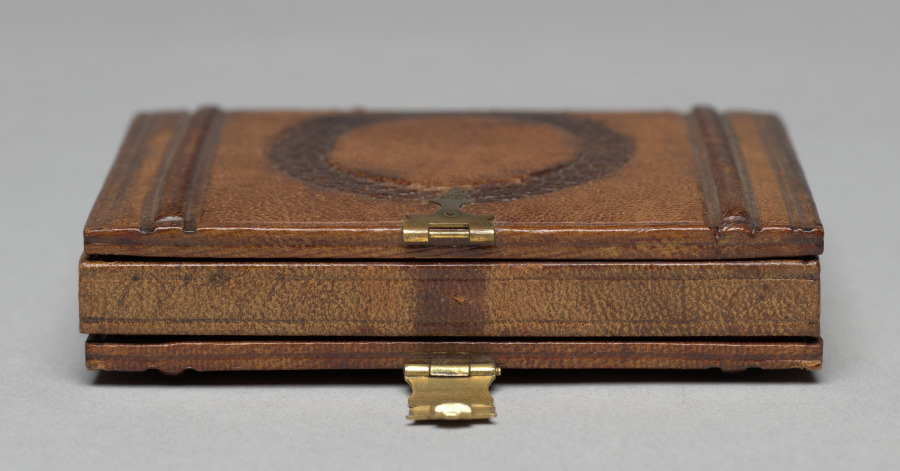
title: Seated boy in tasseled cap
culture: America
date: c. 1858–61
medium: ambrotype, sixth plate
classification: Photograph